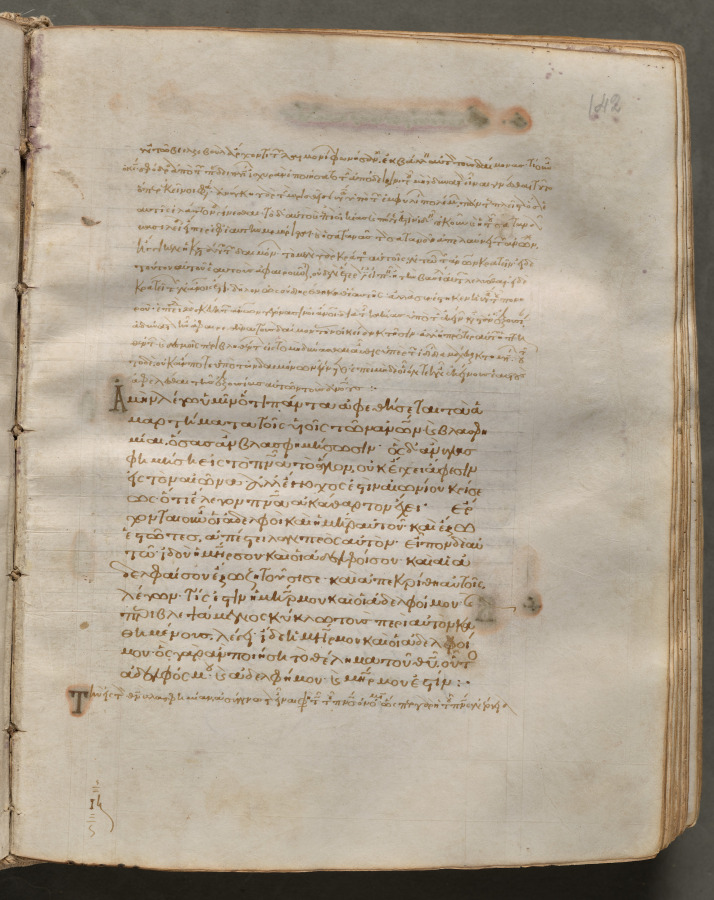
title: Text, folio 142 (recto), from a Gospel Book with Commentaries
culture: Byzantium, Constantinople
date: c. 1000–1100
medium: ink, tempera, and gold on vellum; leather binding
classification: Bound Volume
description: Each of the four gospels in this book opens on a page with brilliantly illuminated borders depicting the author of the text as well as birds-principally peacocks, symbols of the immortality of the soul-and fountains, representing the fountain of life and the salvation of the soul. This volume consists of 428 leaves with texts in Greek. Its level of sophistication suggests that it was probably written and decorated in a monastery in Constantinople.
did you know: Gospel Books were carried in procession through Byzantine churches.